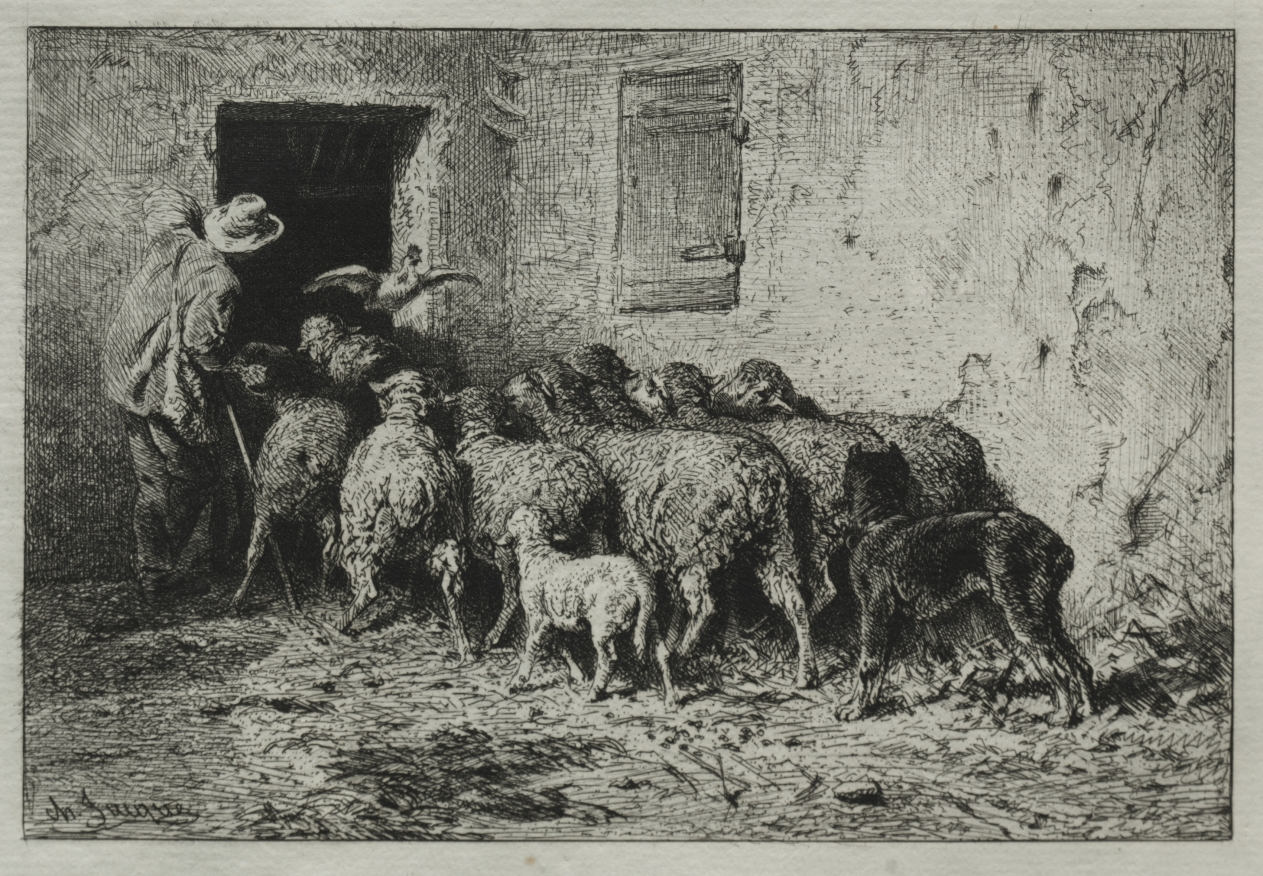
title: The Return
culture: France, 19th century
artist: Charles-Émile Jacque (French, 1813–1894)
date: 1864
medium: etching and drypoint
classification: Print